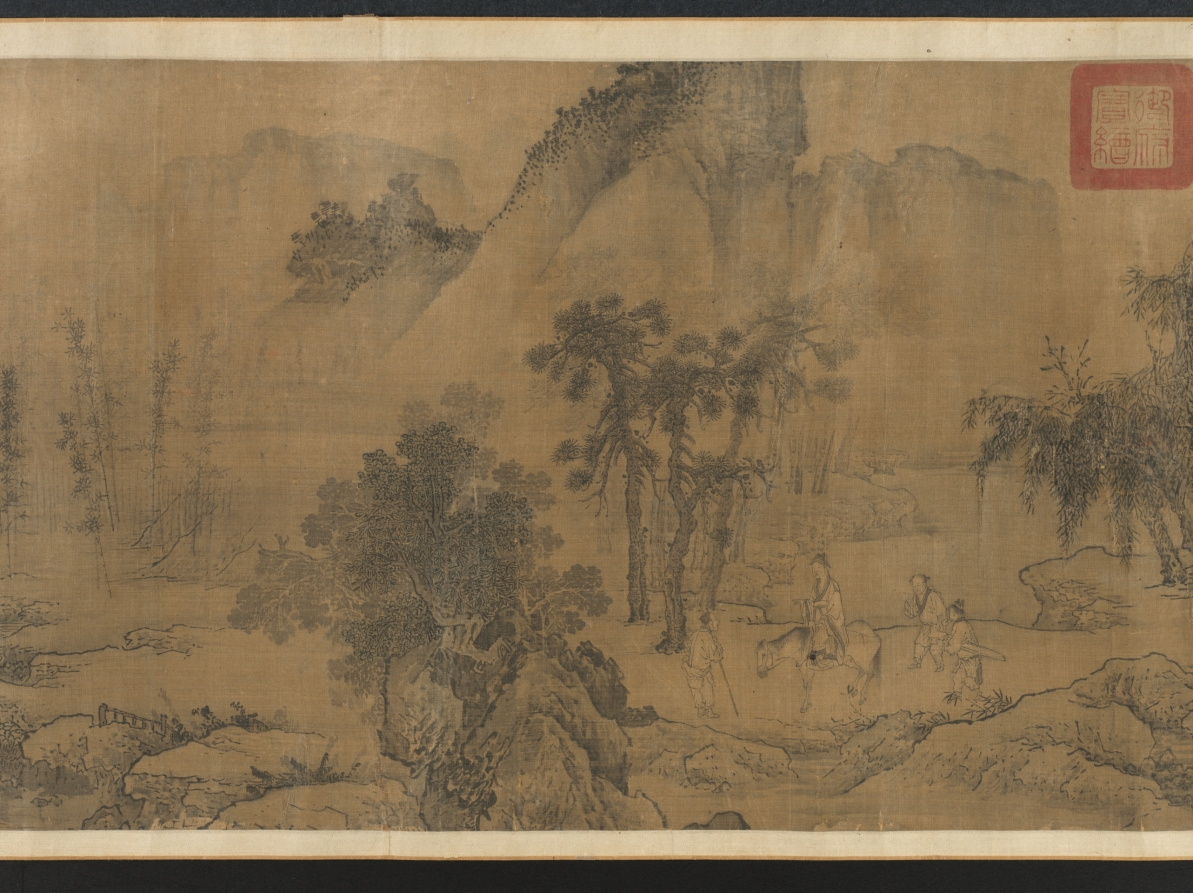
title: Tao Yuanming's Return Home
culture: China, Yuan dynasty (1271-1368)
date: 1300s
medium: Handscroll; ink and slight color on silk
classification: Painting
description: Tao Yuanming's revered poem "Return Home 歸去來辭 (Gui qu lai ci)" powerfully conveys his desire to leave bureaucratic life for the simplicity and authenticity of nature. This sentiment has deeply resonated with generations of Chinese scholars, making it a popular theme in paintings. This handscroll uses continuous narrative depicting Tao in multiple scenes from the poem. Starting on the right, the poet travels to his home. His children wait by the gate, while his wife pauses to tidy her hair before welcoming him. Then, free from the burdens of official service, Tao spends time in both nature and his cottage, where he can again enjoy wine, music, and books.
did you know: Poet Tao Yuanming 陶淵明 (c. 365–427 CE) returned to a secluded life instead of pursuing a civil service career.